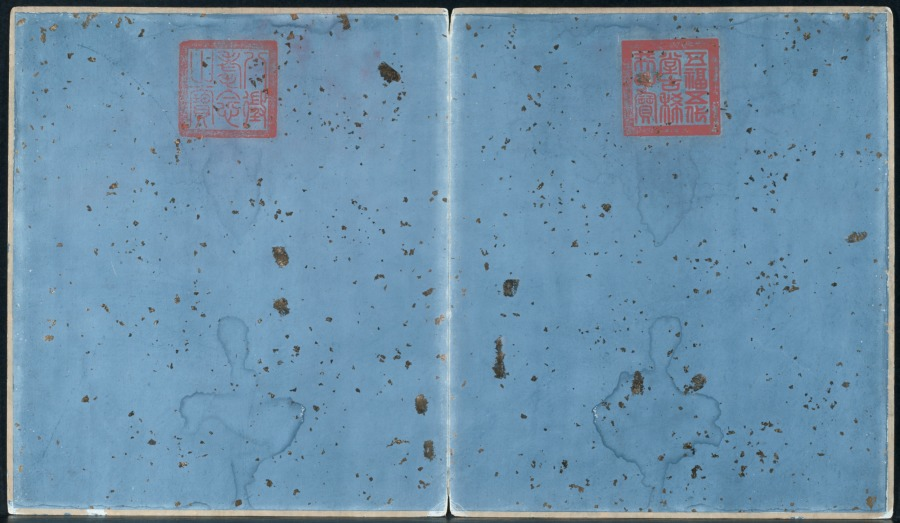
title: Battle Scenes of the Quelling of Rebellions in the Western Regions, with Imperial Poems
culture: China, Qing dynasty (1644–1911), Qianlong reign (1736–95)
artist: Giuseppe Castiglione (Italian, 1688–1766)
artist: Jean Damascene Sallusti (Italian, d. 1781)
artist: Jean Denis Attiret (French, 1702–1768)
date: c. 1765–74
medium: Etchings, mounted in album form, 16 leaves plus two additional leaves of inscriptions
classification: Print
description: This set of etchings was commissioned by Emperor Qianlong to record in pictorial terms the courage of his generals and soldiers in quelling the rebellions in the Western Regions. Qianlong added his own poem to each of the etchings, indicating his appreciation and pride in this demonstration of military might. "Western Regions" refers to the present-day Xingjiang province, often described in Western writing as "Central Asia."